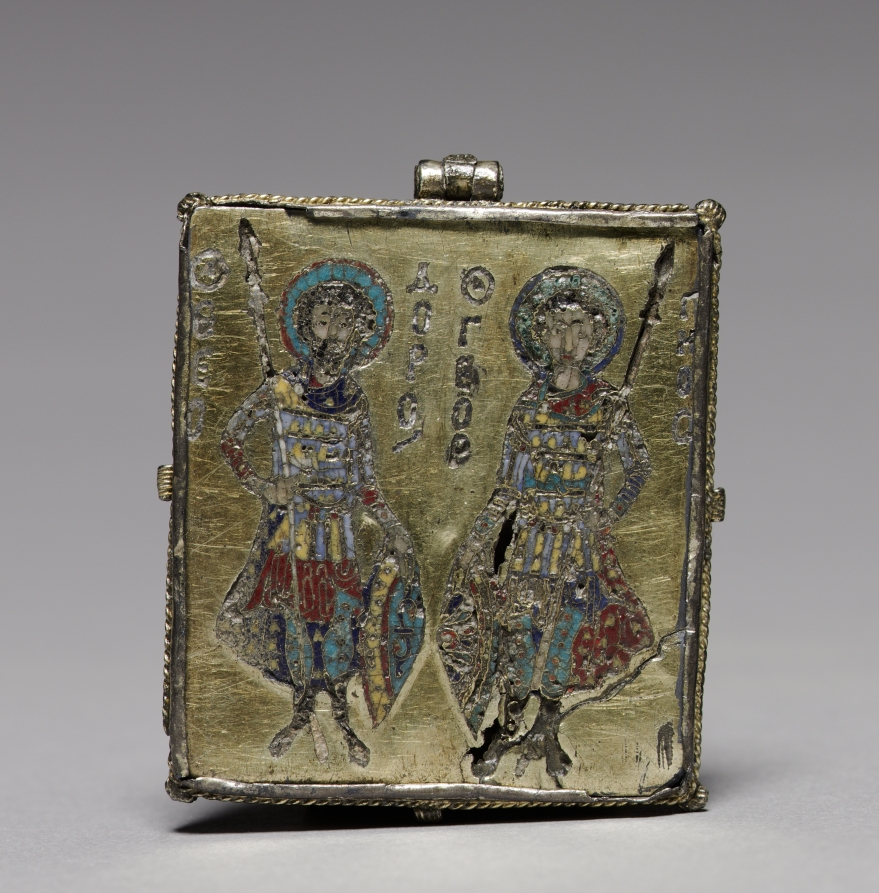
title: Enkolpion with the Crucifixion (front) and Saints Theodore and George (back)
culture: Byzantium, Constantinople, Byzantine period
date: 1080–1120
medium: silver gilt and cloisonné enamel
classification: Metalwork